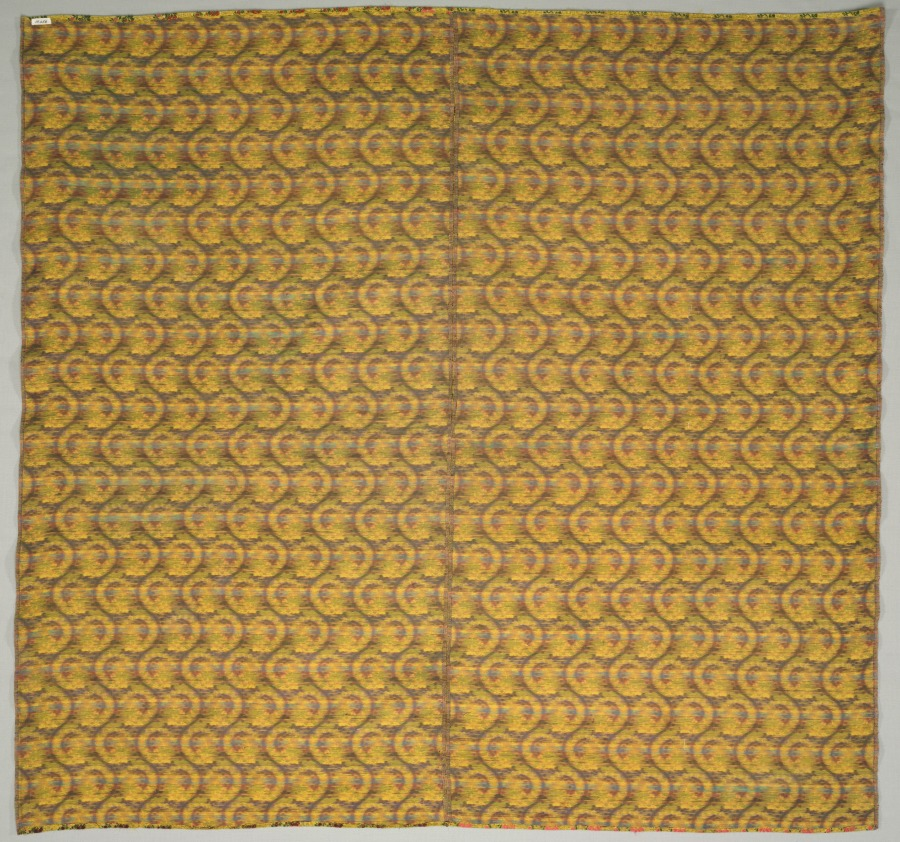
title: Two Loom Widths Sewn Together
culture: Iran, 19th - early 20th century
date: 1800s - early 1900s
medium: compound weave with silk and metal tread weft brocade; loom width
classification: Textile